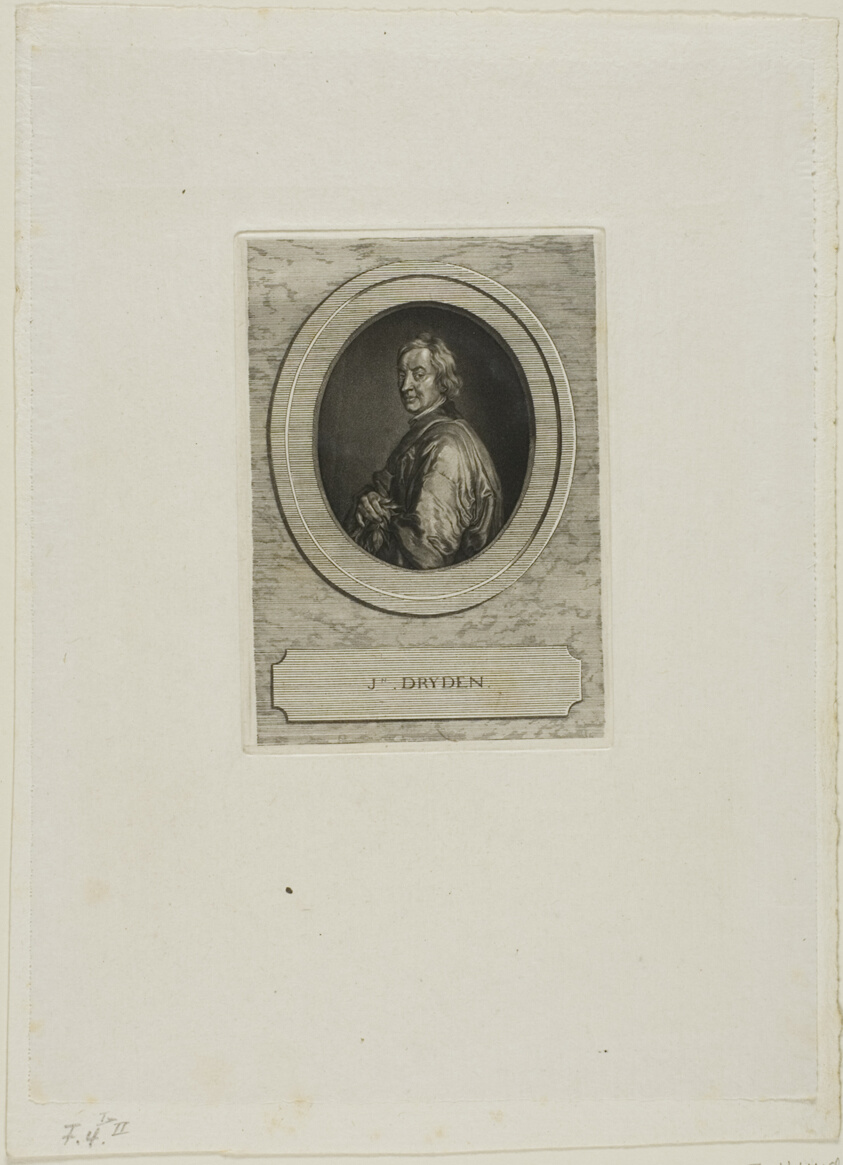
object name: Print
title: John Dryden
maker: Jean-Baptiste de Grateloup (French, 1735-1817)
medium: Aquatint on paper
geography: France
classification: aquatint; print; prints and drawing